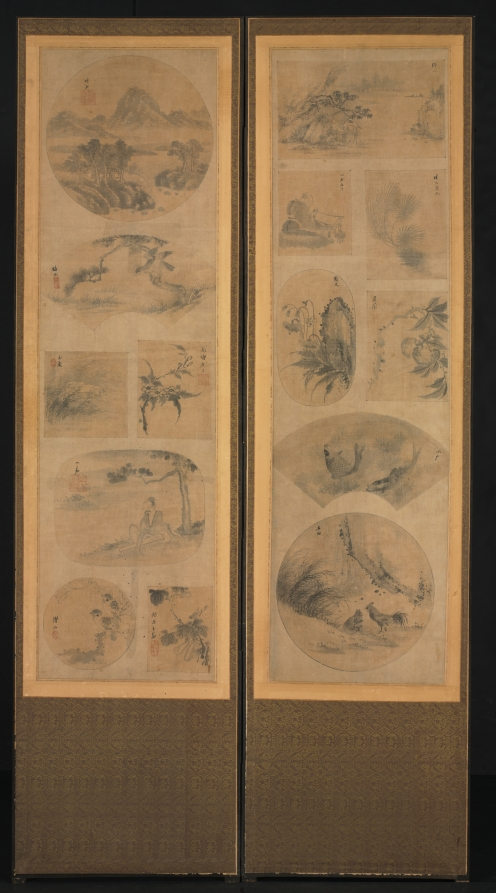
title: Painting of One Hundred Themes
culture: Korea, Joseon dynasty (1392–1910)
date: late 1800s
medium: Ten-panel folding screen affixed with album leaves (obverse), calligraphy (reverse), ink and color on silk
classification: Painting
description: The front of this screen features an assortment of subjects: birds and flowers, landscapes, and scenes of everyday life, mostly in monochromatic ink with light colors. The screen’s reverse side conveys a number of classical poems about the fleeting beauty of the four seasons. Traditionally, only one side of a folding screen bears painted or embroidered images, since these were used as a background furnishing. In Korean houses by the 1800s and early 1900s, however, two-sided folding screens became noticeably popular, possibly inspired by Japanese double-sided folding screens, which mainly served as room dividers in Japanese households.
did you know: The way of displaying small images of various subjects became one of the most popular type of painting toward the end of the 19th century.